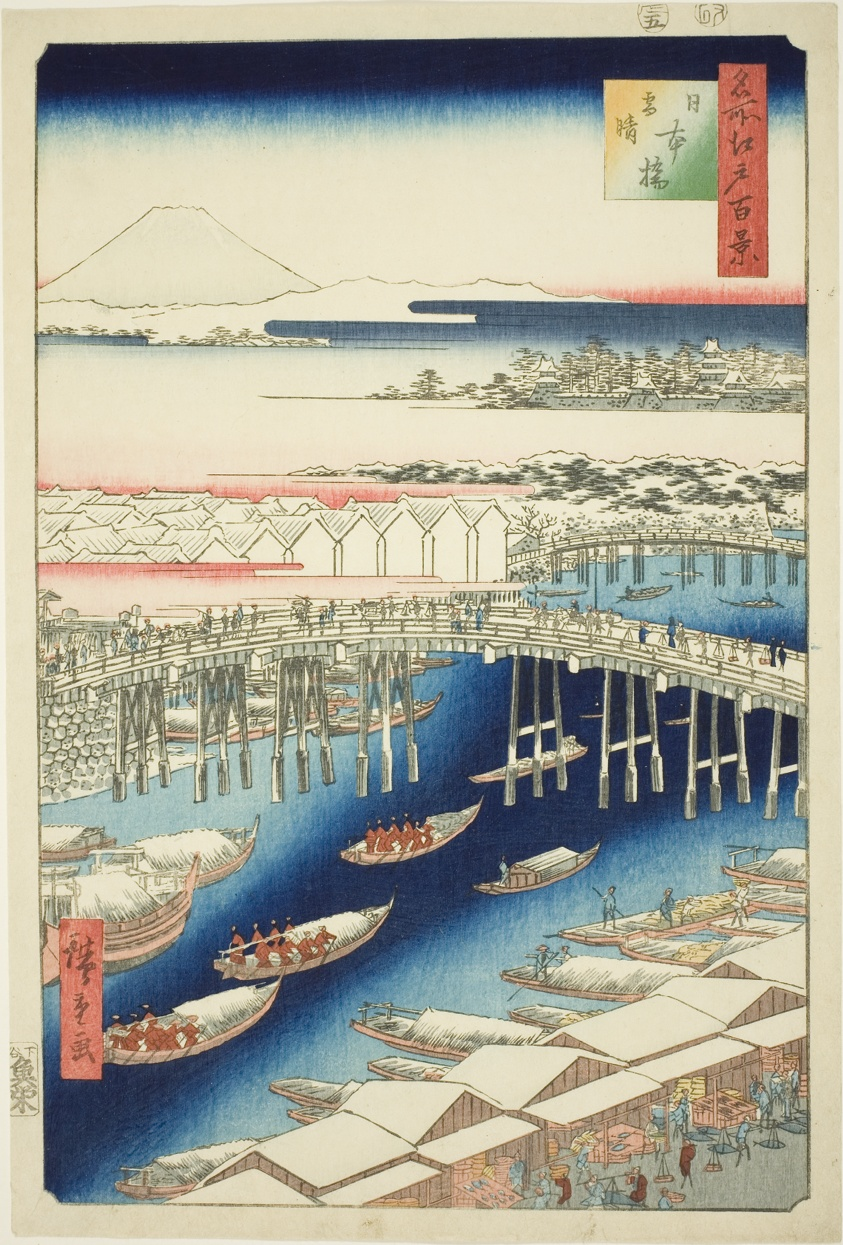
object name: Print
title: Clear Weather After Snow at Nihon Bridge (Nihonbashi yukibare), from the series "One Hundred Famous Views of Edo (Meisho Edo hyakkei)"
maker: Utagawa Hiroshige 歌川 広重; Japanese, 1797-1858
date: 1856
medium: Color woodblock print; oban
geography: Japan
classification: woodblock print; print; asian art